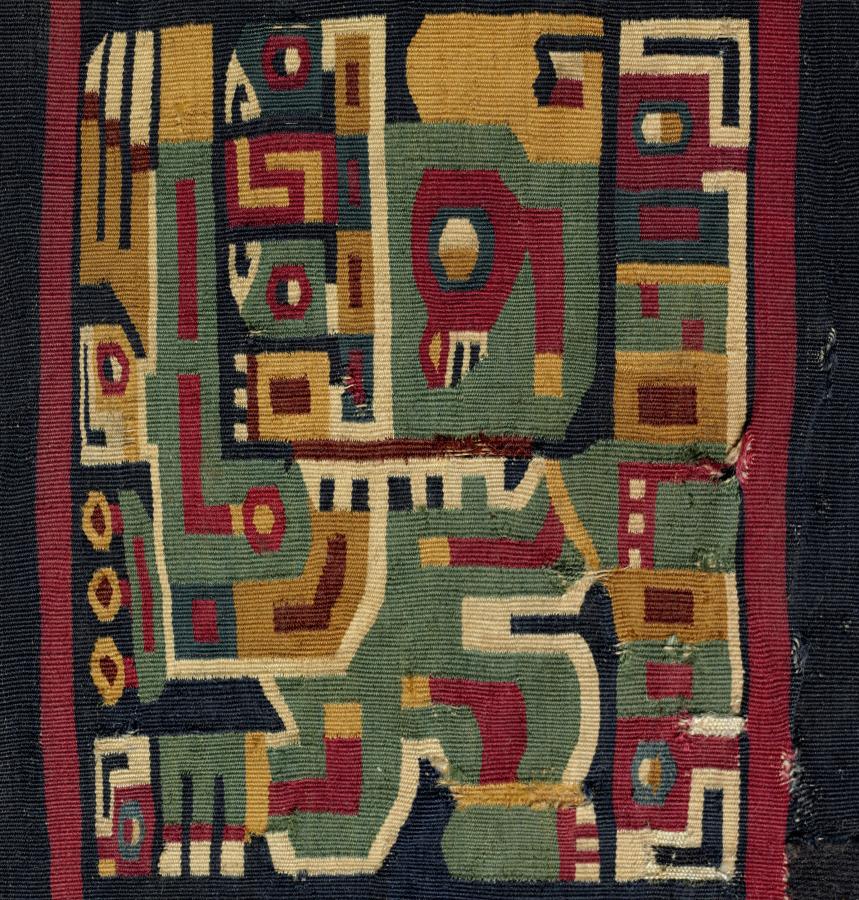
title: Half of a Sleeved Tunic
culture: Central Andes, Middle Horizon, Wari, 6th-11th century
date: c. 500–1000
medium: single-interlocked tapestry; cotton warp; camelid fiber weft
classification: Textile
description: The bird-headed creature in profile that repeats in each of this tunic's design fields gazes upward, holds a staff of authority in front of its body, and wears an ornate headdress behind which a three-feathered wing can be seen. The extremely high technical quality of such tunics suggests that the Wari reserved bird imagery for their most exalted rulers. Here, the original incorporated more than twice as much yarn as the routine--some 19 miles, all handmade and much dyed an inky, dark blue, the most prestigious of Wari colors.